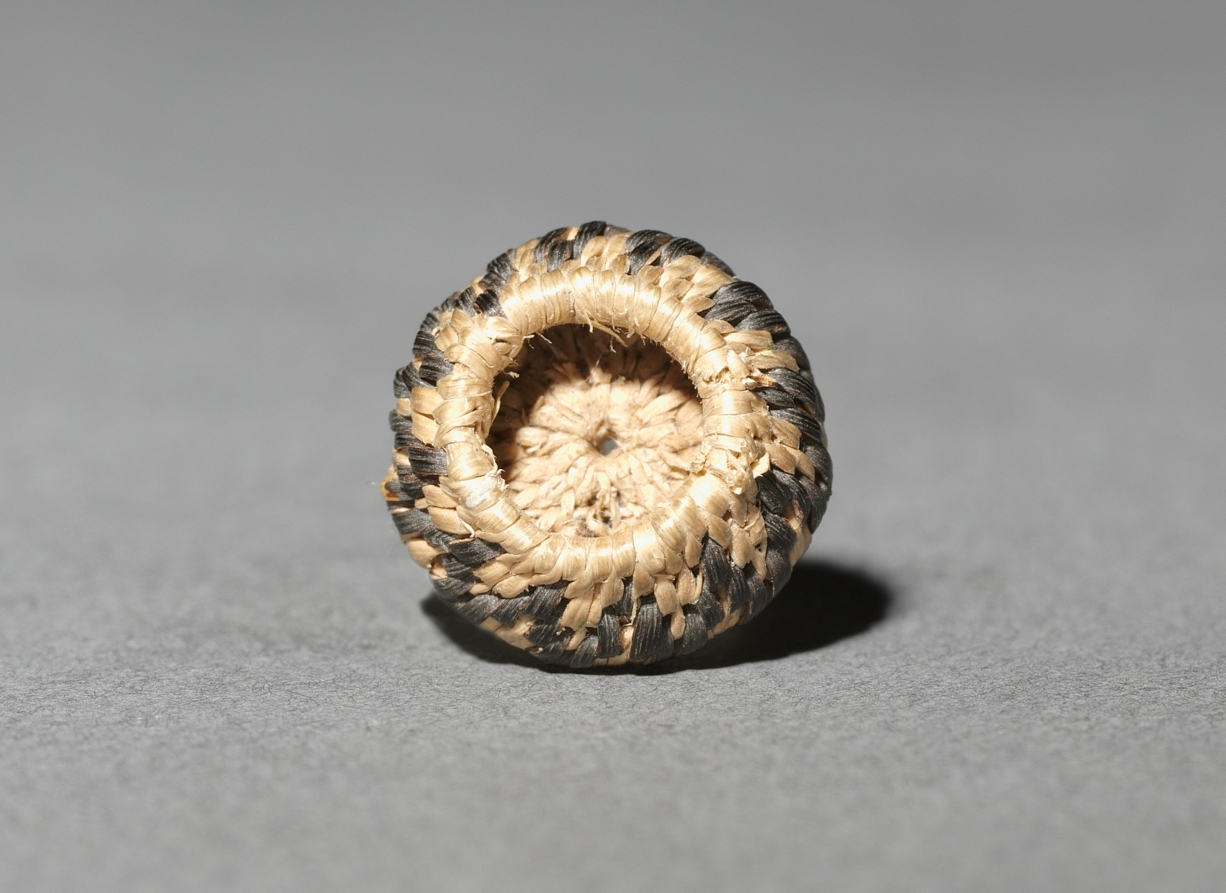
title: Miniature Round Basket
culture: California, Pomo, late 19th-early 20th century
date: late 1800s-early 1900s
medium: plant materials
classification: Basketry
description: Miniature baskets were made to demonstrate the basket-maker’s virtuoso skill, and these tiny marvels seem to be no exception—the smallest are only five millimeters wide but still patterned. For such fine work, dexterity was required as much for preparation of materials as for weaving.